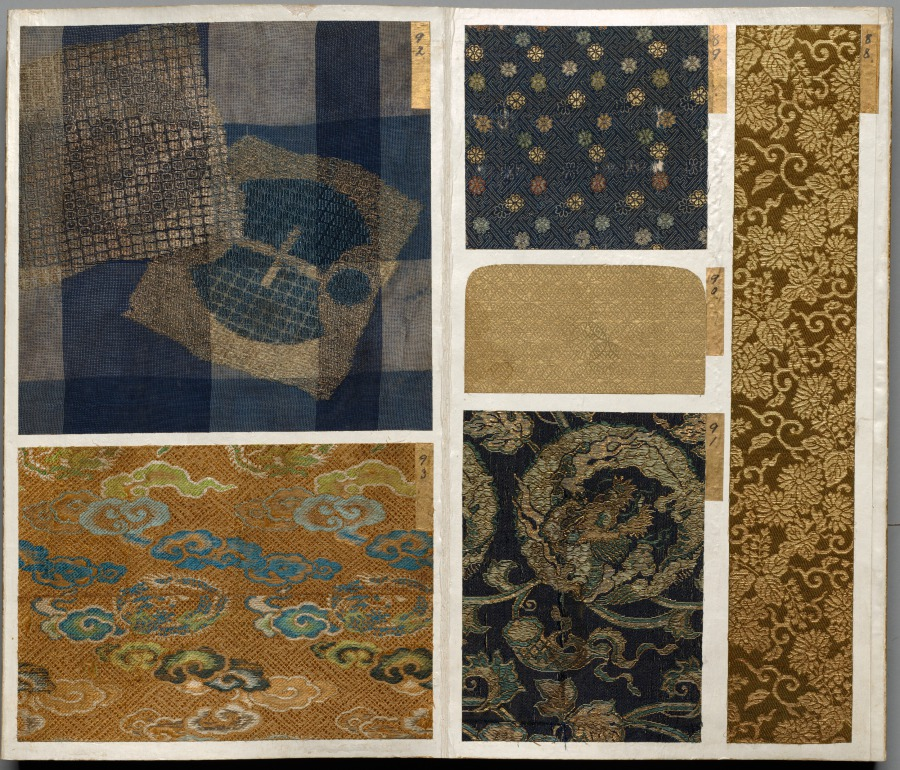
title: Album of Textile Samples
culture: Japan, Edo period (1615–1868)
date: 1600s-1700s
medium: silk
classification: Textile